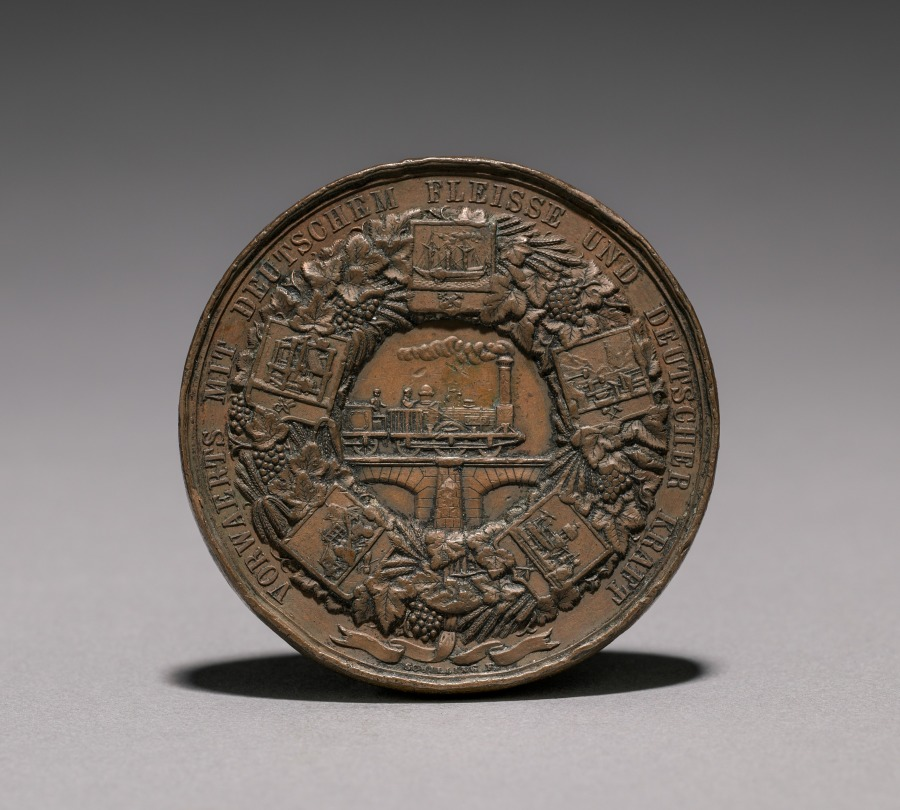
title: Medal Commemorating the Exhibition of Textiles, Berlin, 1844 (reverse)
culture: Germany, 19th century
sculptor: Emil Schilling (German)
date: 1844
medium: bronze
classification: Metalwork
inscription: "VORWAERTS MIT DEUTSCHEM FLEISSE UND DEUTSCHER KRAFT."